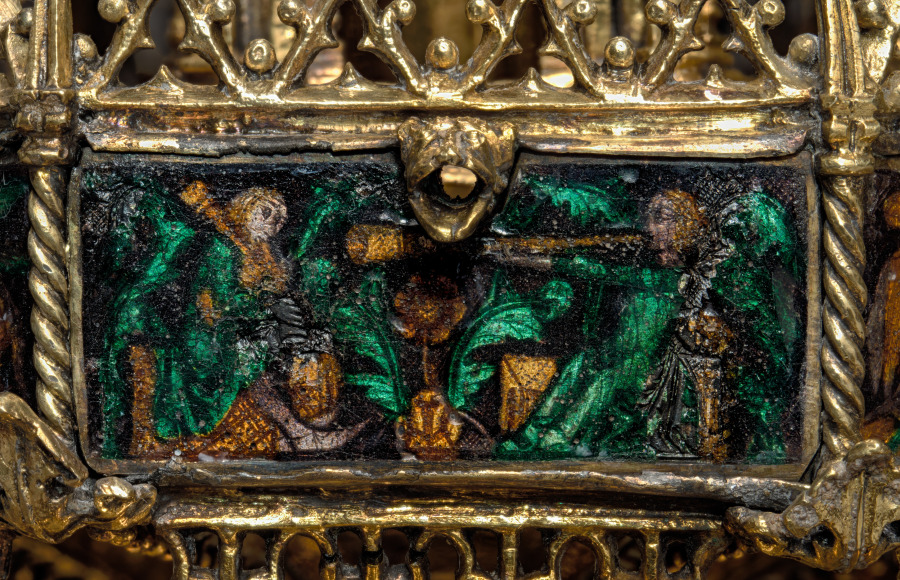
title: Table Fountain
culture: France, Paris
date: c. 1320–40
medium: gilt-silver and translucent enamels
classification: Metalwork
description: Conceptually and stylistically, this object is beyond all else a piece of Gothic architecture in miniature with vaults, pinnacles, columns, and traceried arches. Though the artist who created it is unknown, he was unquestionably inspired by the great Gothic buildings of his time. The table fountain is a three-tiered assembly combining cast elements with bent sheets of gilt-silver. To these have been attached a series of enamel plaques representing grotesque figures, some of which play musical instruments. Water wheels and bells were added to capture motion and sound. The rich detail, precious materials, and involved ornamentation of this deluxe object suggest it would have been expensive to produce and highly treasured by its original owner, someone of high status, and would have been deployed as an object of spectacle. This is the most complete example of its type known to survive from the Middle Ages. Medieval inventories reveal that small fountains like this, often taking various forms, and generally made from precious metals, once existed in large numbers, thus making the Cleveland table fountain an extremely rare object.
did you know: This fountain with its minute architectural details and finely made enamel plaques displayed the wealth and refinement of the owner as it entertained his guests. Imagine hearing the ringing of the tiny bells when this fountain was in use.